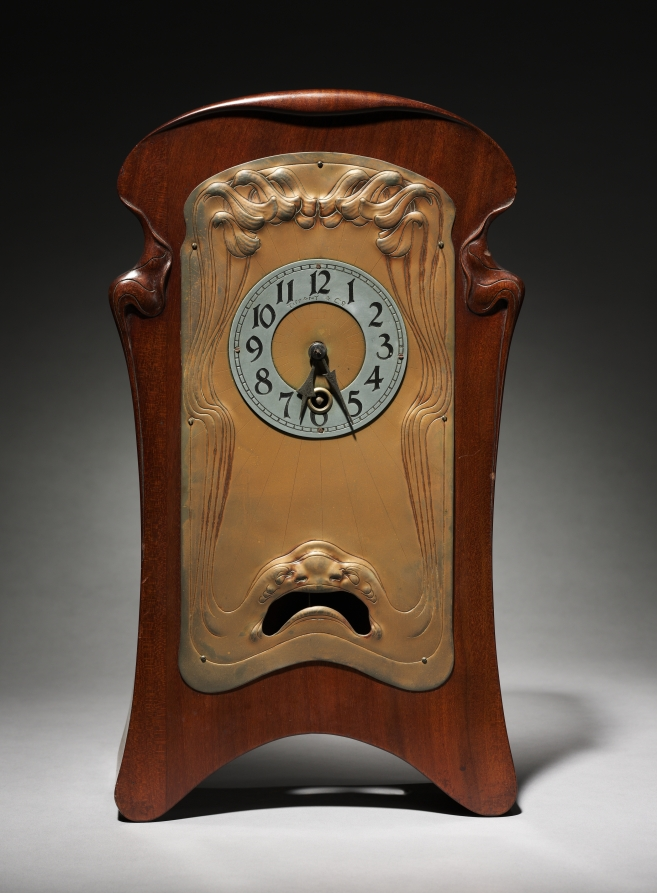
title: Mantle Clock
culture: America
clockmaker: Lenzkirch Clock Factory (German)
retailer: Tiffany & Co. (America, New York, est. 1837)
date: 1901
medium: brass, mahogany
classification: Wood